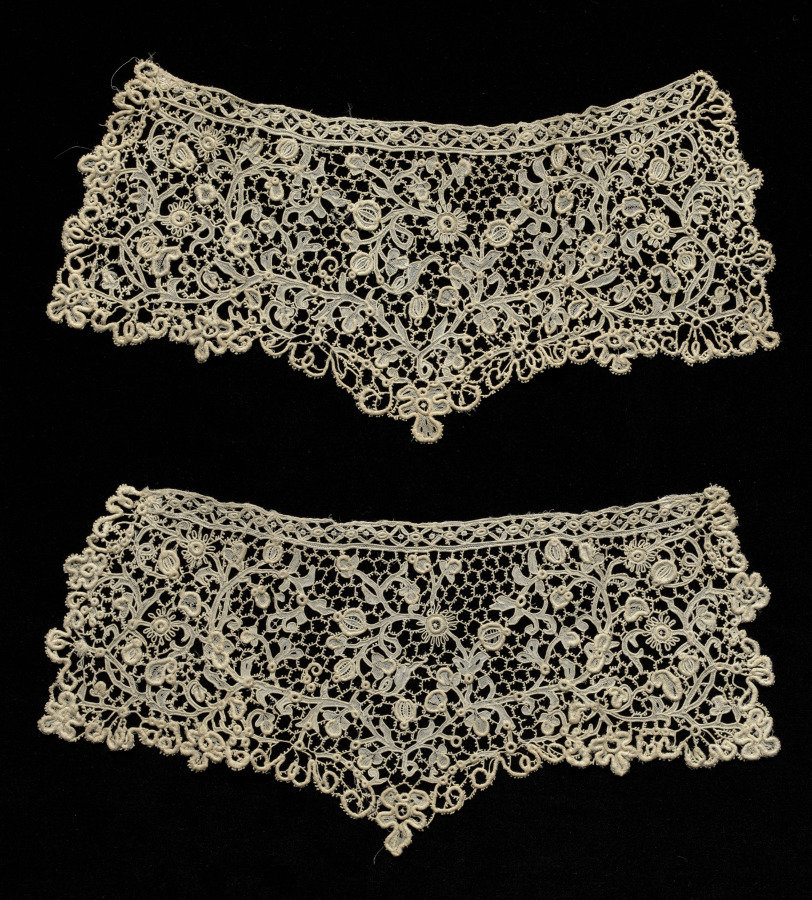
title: Pair of Lace Cuffs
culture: Italy, Venice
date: 1600s–1700s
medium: Needle lace (Venetian rose point)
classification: Lace